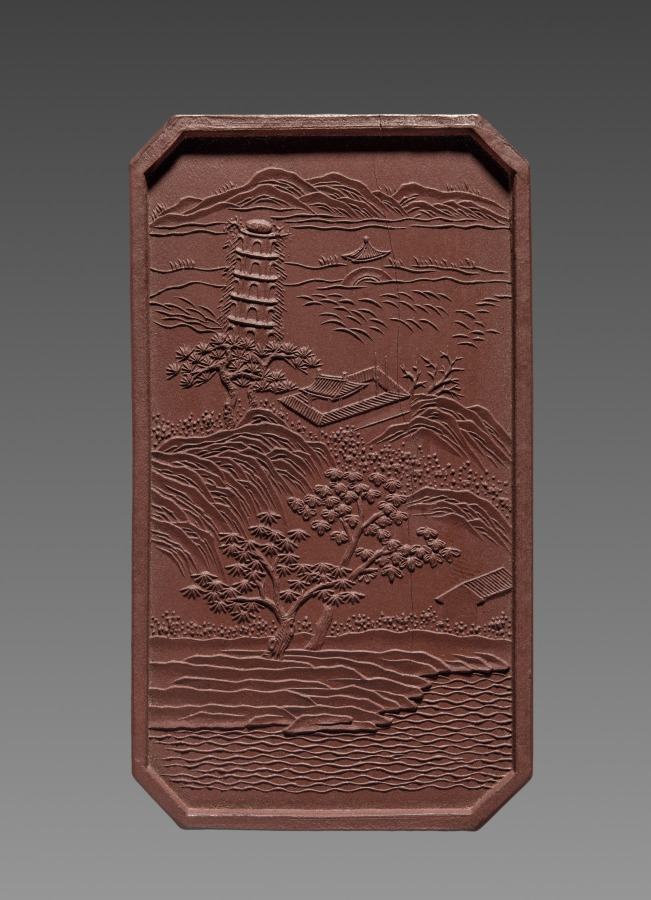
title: Ink Stick from an Imperially Commissioned Set of Ink Stick with Images and Poems of Famous West Lake Sites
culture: China, Qing dynasty (1644–1911), Qianlong reign (1736–95)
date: 1780–94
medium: Molded ink in brown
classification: Miscellaneous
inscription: 乾隆年製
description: This is one of ten ink cakes of different shapes and colors stored in an exquisite lacquer box. Each is inscribed in gold with a poem by the Qianlong emperor, praising the ten famous sights of the Westlake in Hangzhou, near Shanghai. The Westlake is famous for its natural beauty; it was a favorite imperial destination and remains a tourist attraction today. Ink cakes (also called ink sticks) are dissolved with the addition of water and ground on the surface of a flat stone into liquid ink for painting and calligraphy. The precious ink cakes here, however, have never been used.